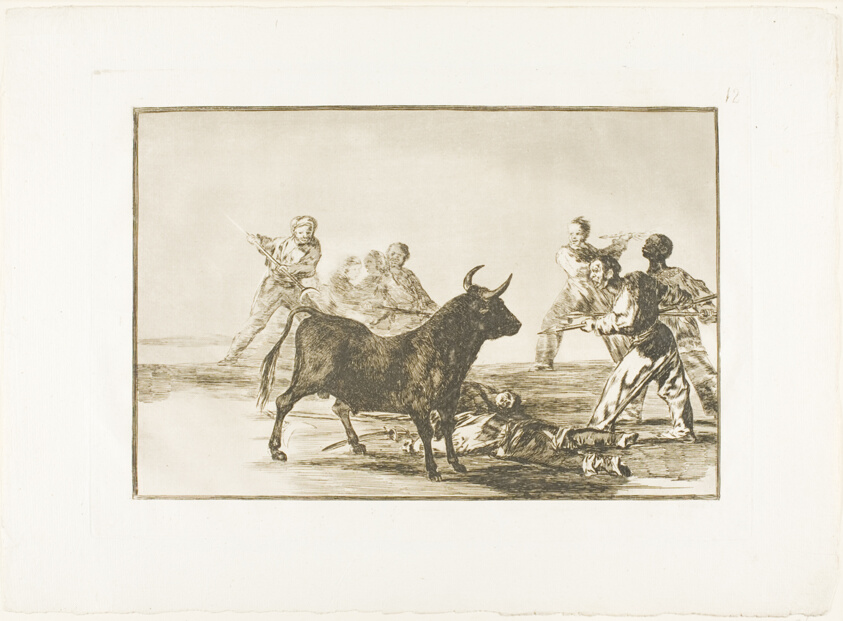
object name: Print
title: The rabble hamstring the bull with lances, sickles, banderillas and other arms, plate twelve from The Art of Bullfighting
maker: Francisco José de Goya y Lucientes (Spanish, 1746-1828)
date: 1814/16, published 1816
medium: Etching, burnished aquatint and drypoint on ivory laid paper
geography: Spain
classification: etching; print; prints and drawing